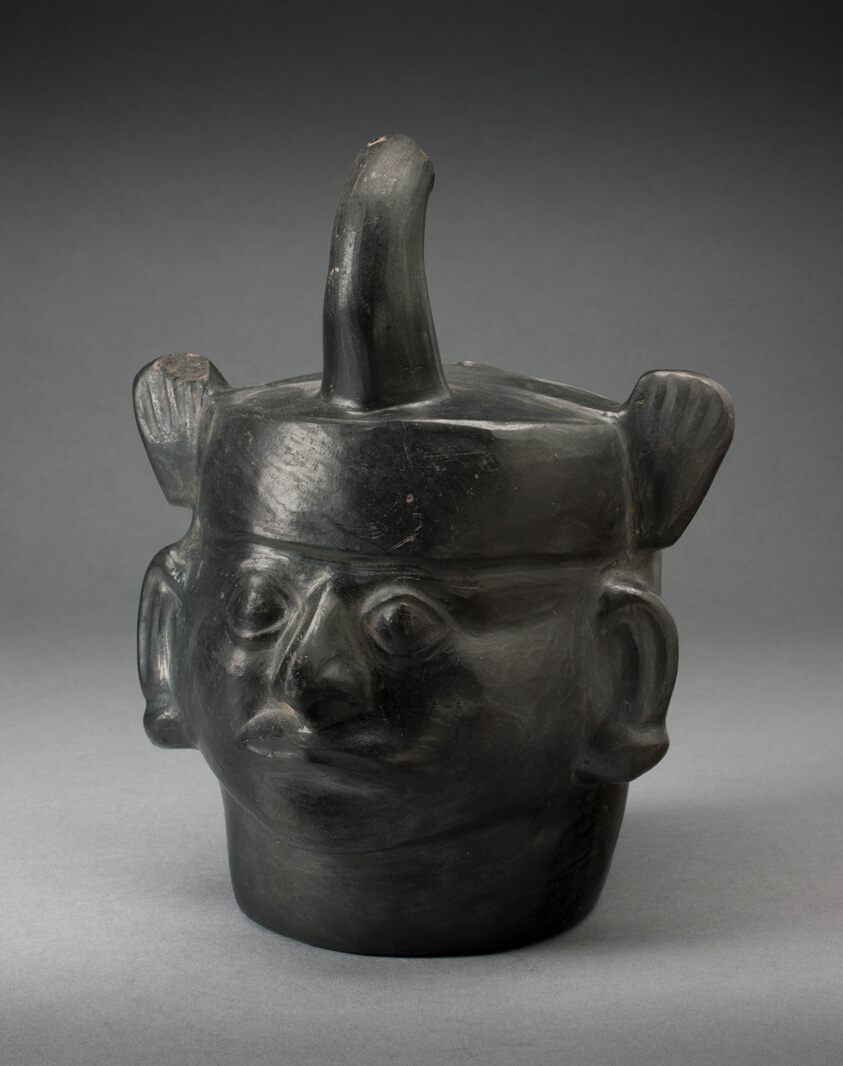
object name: Vessel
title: Portrait Vessel in the Form of a Ruler Wearing a Feline Headdress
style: moche, Arts of the Americas, andes, south american, andean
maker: Moche (Chimbote, Santa Valley, north coast, Peru)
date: 100 BCE–500 CE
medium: Ceramic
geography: Peru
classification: earthenware; ceramics; vessel; art of the americas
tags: people, portraits